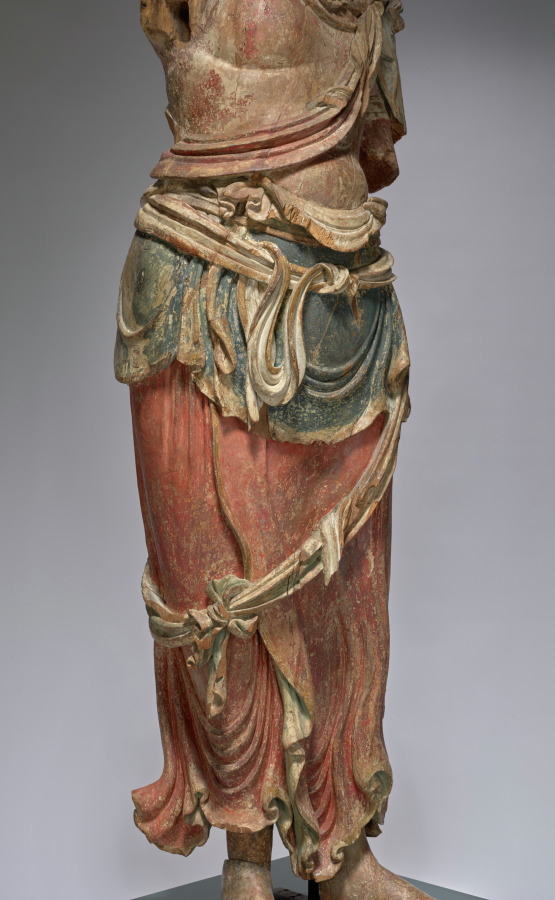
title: Eleven-Headed Guanyin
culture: China, late Northern Song dynasty (960-1127) - Jin dynasty (1115-1234)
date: 1100–1200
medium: wood with polychromy and cut gold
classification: Sculpture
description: The bodhisattva is an enlightened being dedicated to the spiritual awakening of all beings. The compassionate bodhisattva Guanyin, in a variety of manifestations, is probably the most popular deity of worship in Chinese Buddhism. In the Esoteric Buddhist form shown here, this standing Guanyin has a total of eleven heads, with smaller ones above the principal head. The uppermost head represents the Buddha Amitabha, to whom he is closely related. The eleven heads symbolize the Buddha’s steps on the path to enlightenment.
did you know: This Guanyin is carved from a single block of willow (genus Salix sp.).